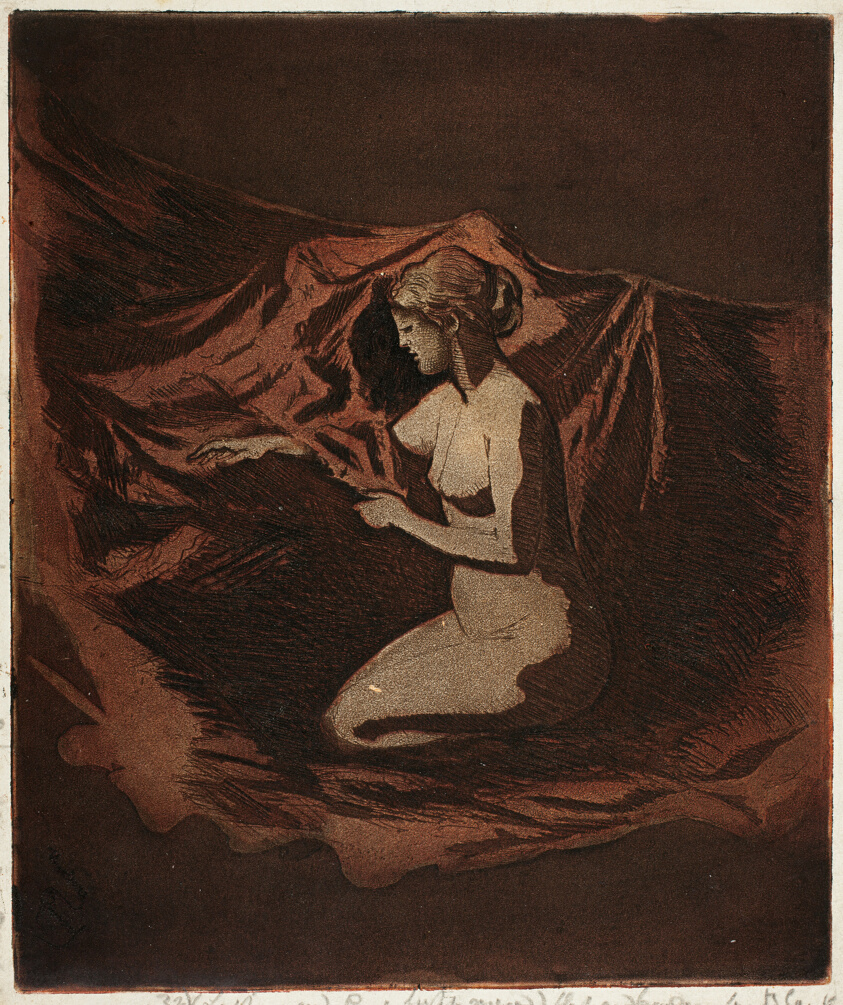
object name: Print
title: Embers Glow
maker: Theodore Roussel (French, worked in England, 1847-1926)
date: 1890–97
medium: Color etching and aquatint on cream (laid) Japanese paper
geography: England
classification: etching; aquatint; paper; print; prints and drawing